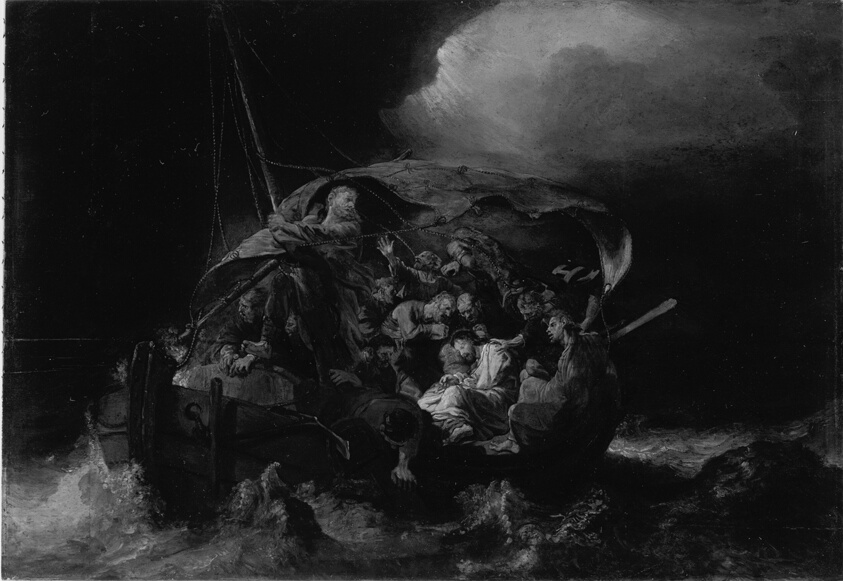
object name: Painting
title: Christ in the Storm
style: 17th Century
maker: Heinrich Jansen (Danish, 1625–1667)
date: c. 1650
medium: Oil on panel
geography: Denmark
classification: oil on panel; dutch; oil paintings (visual works); paint; painting; european painting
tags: Christian subjects, rain, waves, boatman, ships, men, weather/seasons, storms, biblical, religious figures, religious, religious scenes, religion, Christianity, Jesus